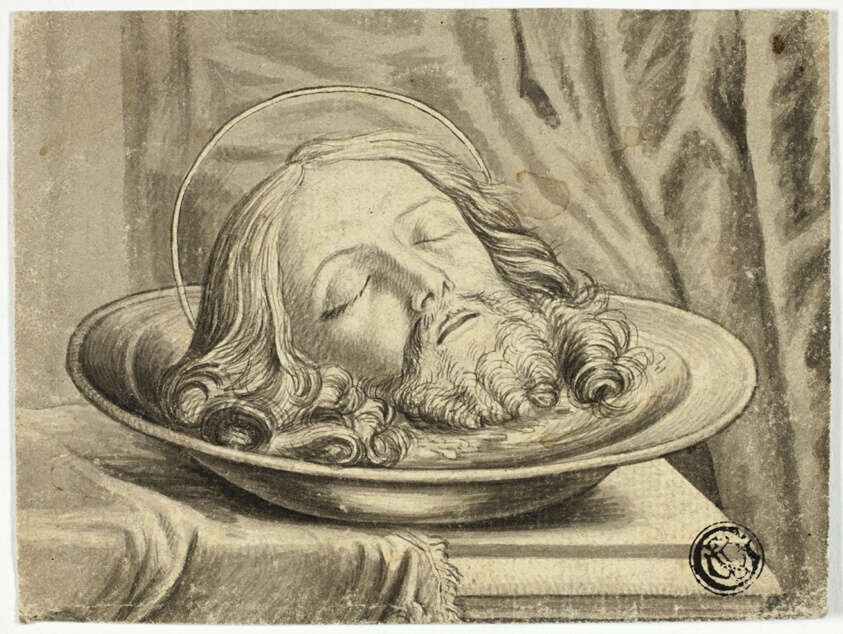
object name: Drawing and Watercolor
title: John the Baptist's Head on Charger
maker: Attributed to Samuel Shelley (English, c. 1750-1808); or after Guido Reni (Italian, 1575-1642)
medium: Pen and black ink, with brush and gray wash, on cream laid paper, laid down on cream laid paper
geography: Italy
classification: pen and ink drawings; drawings (visual works); prints and drawing